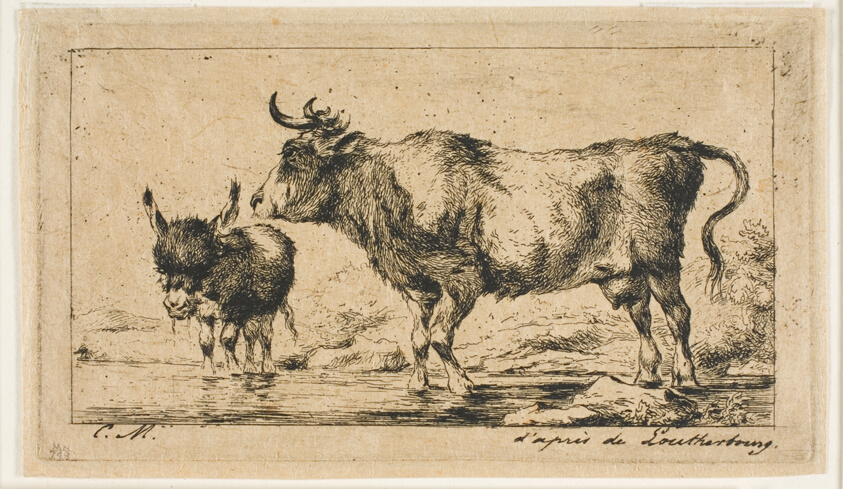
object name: Print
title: The Cow and Ass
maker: Charles Meryon (French, 1821-1868); after Philip Jacques de Loutherbourg (French, 1740-1812)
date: 1849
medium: Etching, printed in black, on tan wove paper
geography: France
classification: etching; print; prints and drawing